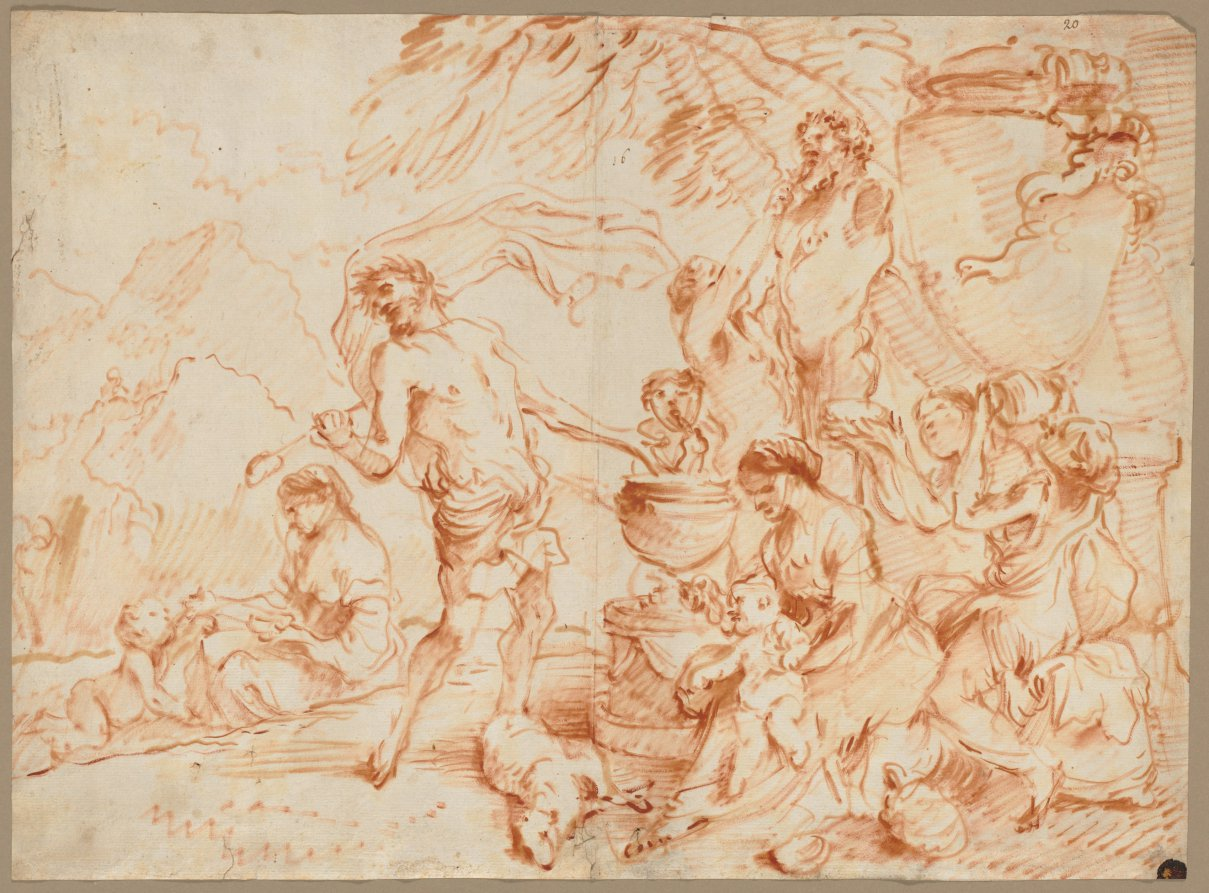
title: Bacchanal Before a Herm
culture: Italy, 17th century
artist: Giovanni Benedetto Castiglione (Italian, 1609–1664)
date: early 1660s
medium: oil and red-brown pigment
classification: Drawing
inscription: upper right, in brown ink: 20 ; upper center, in brown ink: 16 ; VERSO, lower left, in brown ink: 70 [sideways]